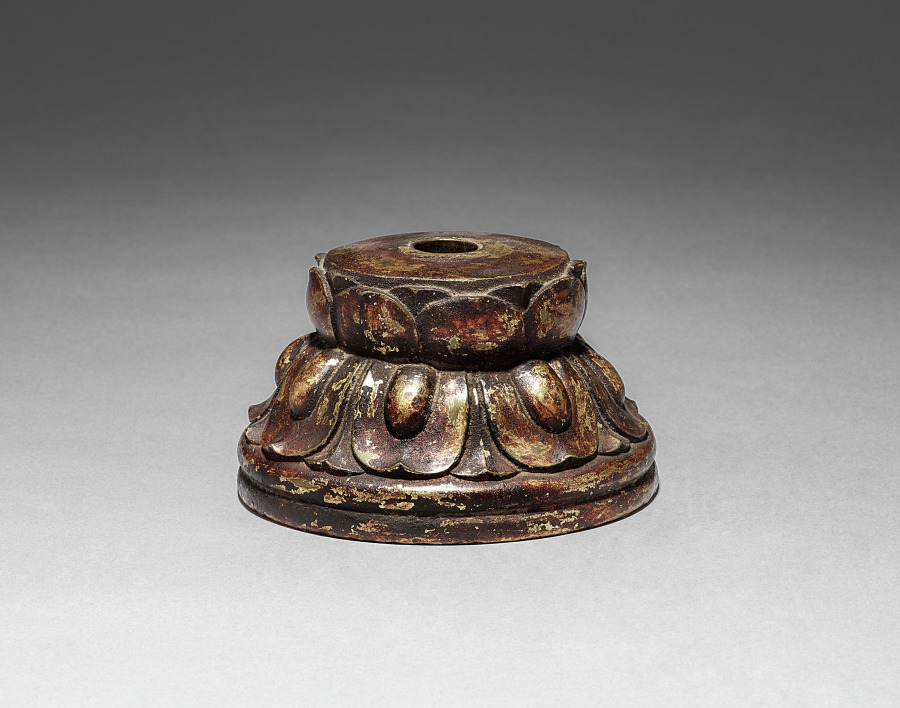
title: Kannon (base)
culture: Japan, Asuka period (538–710)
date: mid-600s to early 700s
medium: gilt bronze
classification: Sculpture